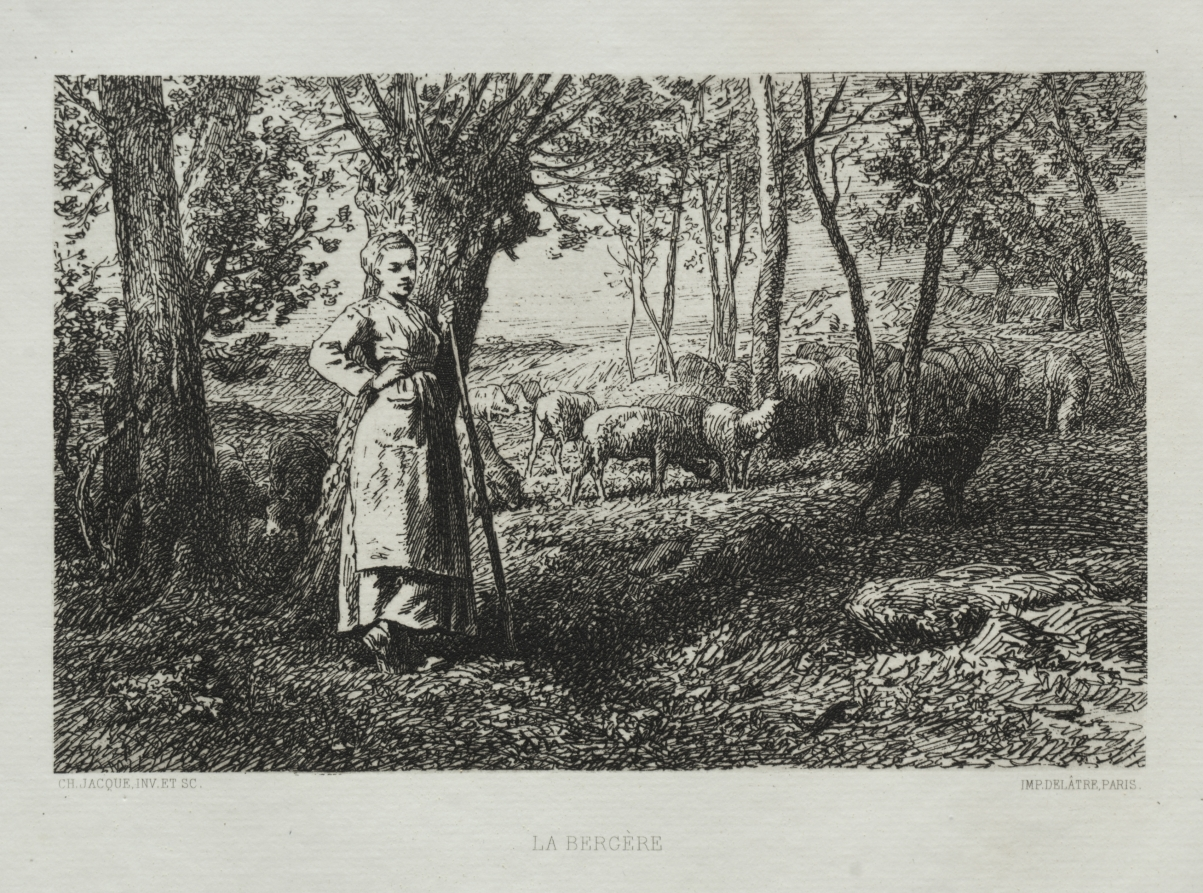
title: The Shepherdess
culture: France, 19th century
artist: Charles-Émile Jacque (French, 1813–1894)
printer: Auguste Delâtre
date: 1868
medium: etching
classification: Print